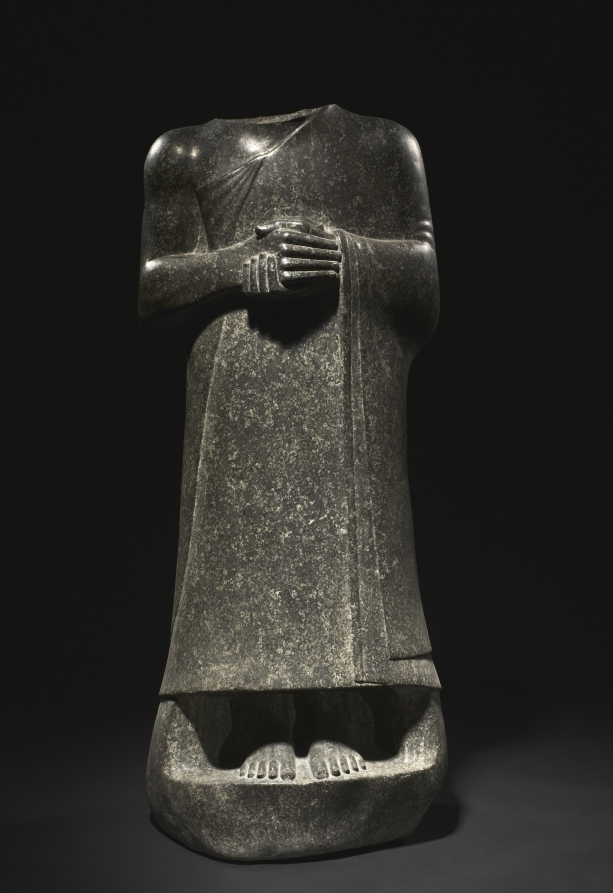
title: Statue of Gudea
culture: Mesopotamia, Neo-Sumerian, Iraq, Girsu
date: c. 2144–2124 BCE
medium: dolerite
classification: Sculpture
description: This headless figure’s clasped hands create a distinctive gesture that recurs frequently on more than 30 recorded statues of the Mesopotamian ruler Gudea. Between c. 2144–2124 BCE, Gudea ruled as ensi (governor) of the city-state of Lagash, located in modern-day Iraq. Scholars have identified more than 2,400 inscriptions that describe his reign, which included patronage of the arts and an extensive building program. Statues like this one would have been placed in temples as stand-ins for Gudea himself, demonstrating his devotion and piety.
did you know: Twice in the 20th century, this headless figure was wrongly "completed" with the head 1963.680, which comes from a similar sculpture.